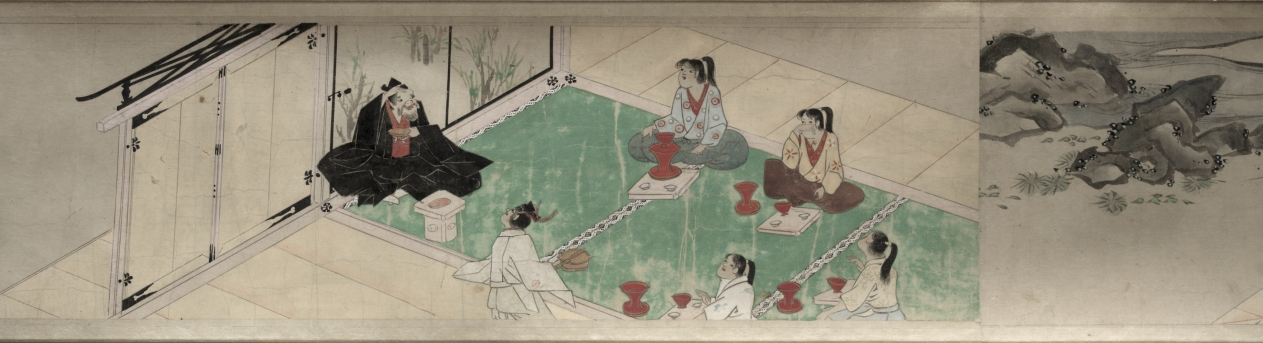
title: The Saltmaker's Story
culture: Japan, Edo period (1615–1868)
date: early 1600s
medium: One of a pair of handscrolls; ink, color, and gold on paper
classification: Painting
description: Once read and copied by girls at New Year’s celebrations and included in dowries, The Saltmaker’s Story is a rags-to-riches tale in which daughters are gifts from the gods. Despite his simple outlook, the main character progresses from humble roots as an associate at Kashima Shrine to the elite status of grandfather of the emperor through the intervention of the Kashima deity. The Saltmaker’s Story is traditionally presented in a set of three scrolls, but the text of this set has been removed by a previous owner, who remounted the illustrations as a pair. The paintings of this one take us from right to left through the second half of the tale.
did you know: This handscroll originally had texts before its paintings, but the texts were removed.